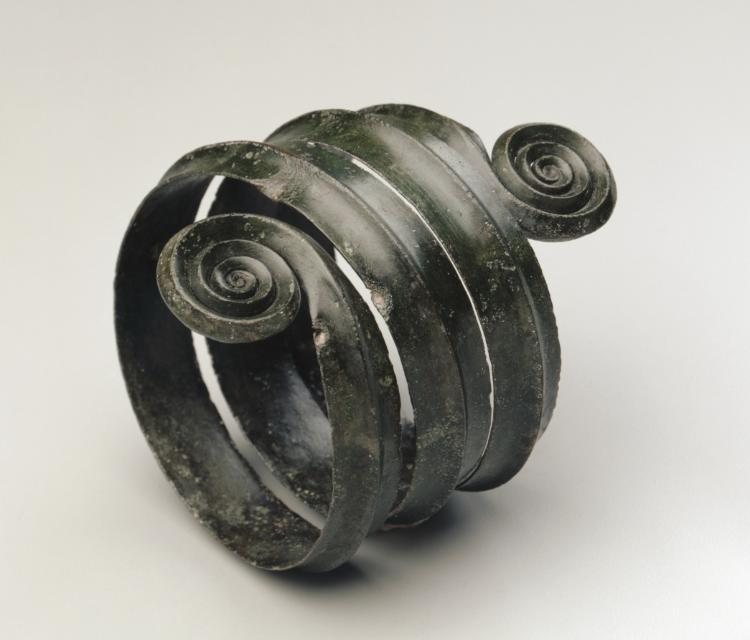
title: Turned Armilla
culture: Hungary, Bronze Age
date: c. 1500 BCE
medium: bronze, wrought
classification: Metalwork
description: Europe. As the spiral mimics forms found in nature - specifically in nautilus shells - it is the basis for logarithmic measures of progression in measurement and growth, which in turn help establish the Fibonacci sequence. Through this sequence we can analyze the phenomenon of spiral designs, specifically in nautilus shells, where the radius of each new chamber grows at a rate determined by a specific proportion to the previous one.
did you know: This armilla or arm ornament has a ridge along the spine, ending in a spiral at both ends.